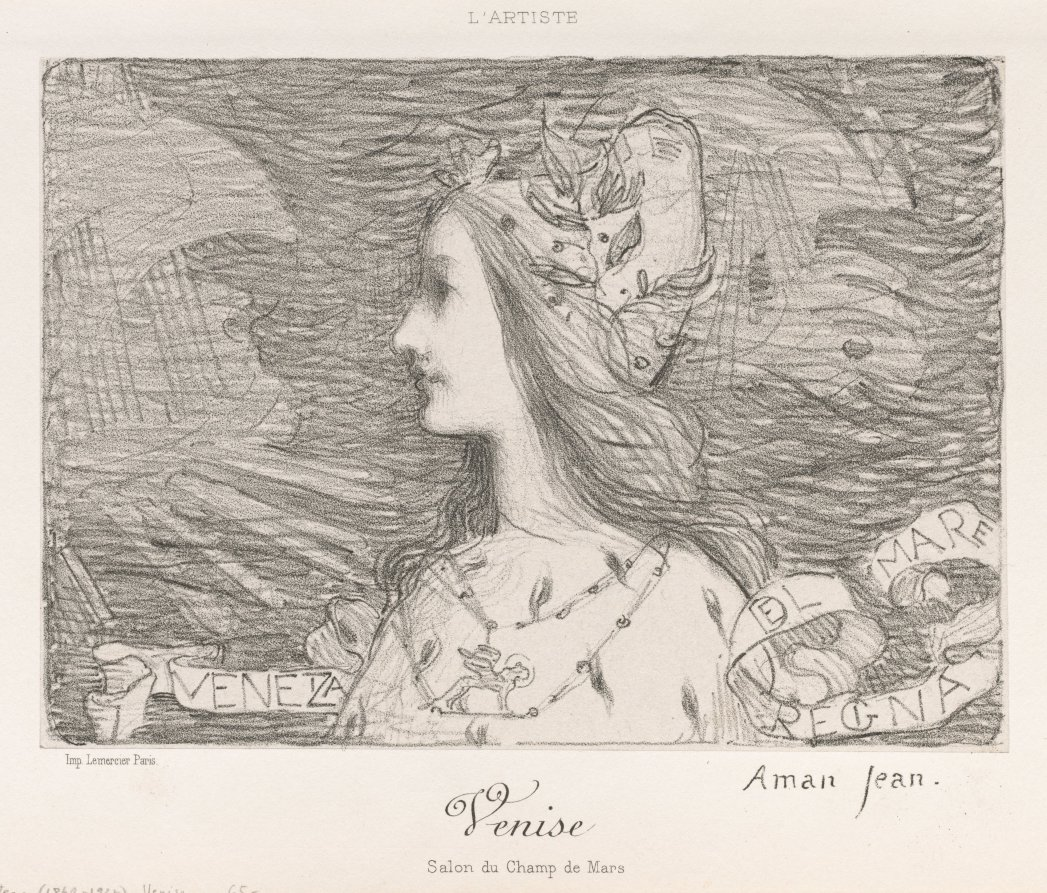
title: Venice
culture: France, 19th century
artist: Edmond François Aman-Jean (French, 1858–1936)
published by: Lemercier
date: 1892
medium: lithograph on chine collé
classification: Print